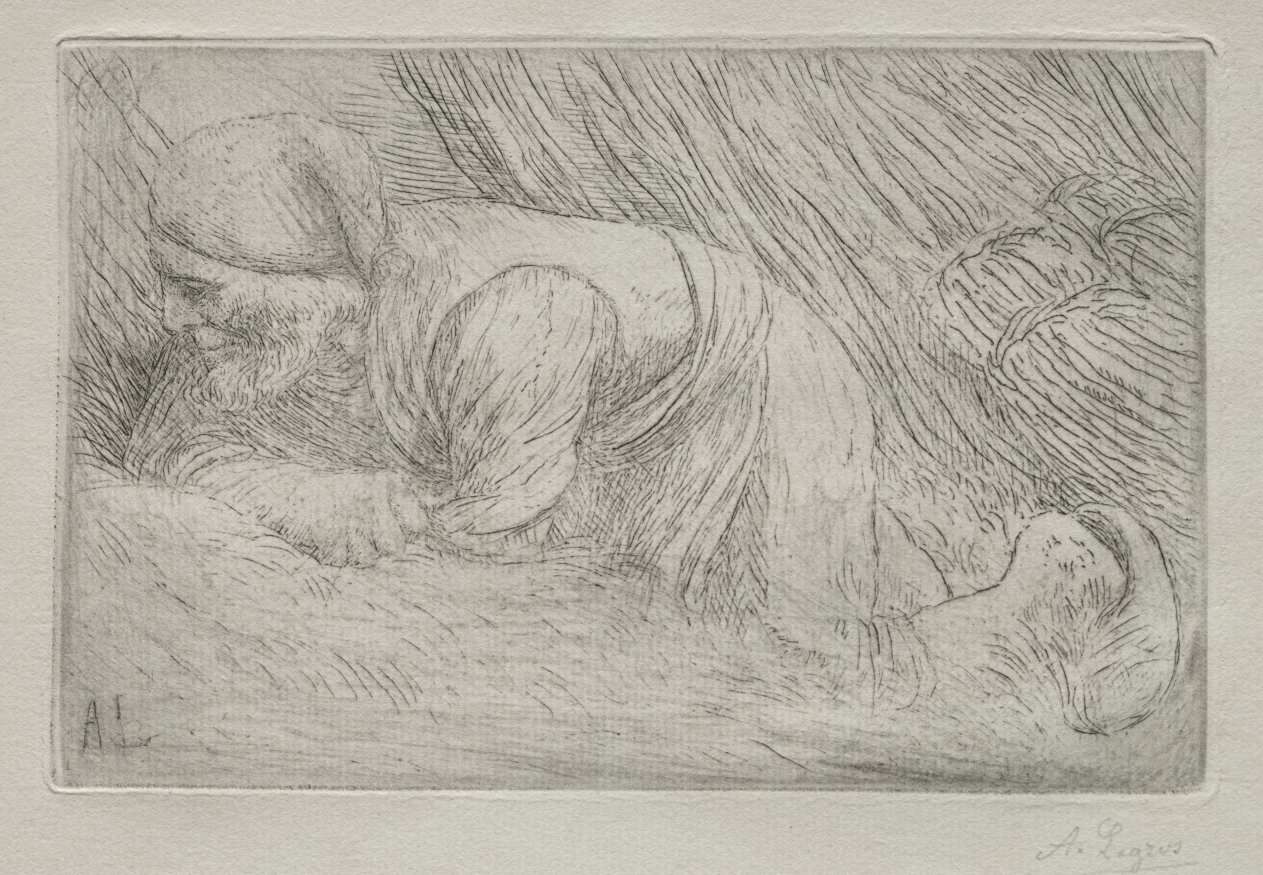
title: The Fagot Gatherers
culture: France, 19th century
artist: Alphonse Legros (French, 1837–1911)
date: c. 1857–1911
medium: drypoint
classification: Print